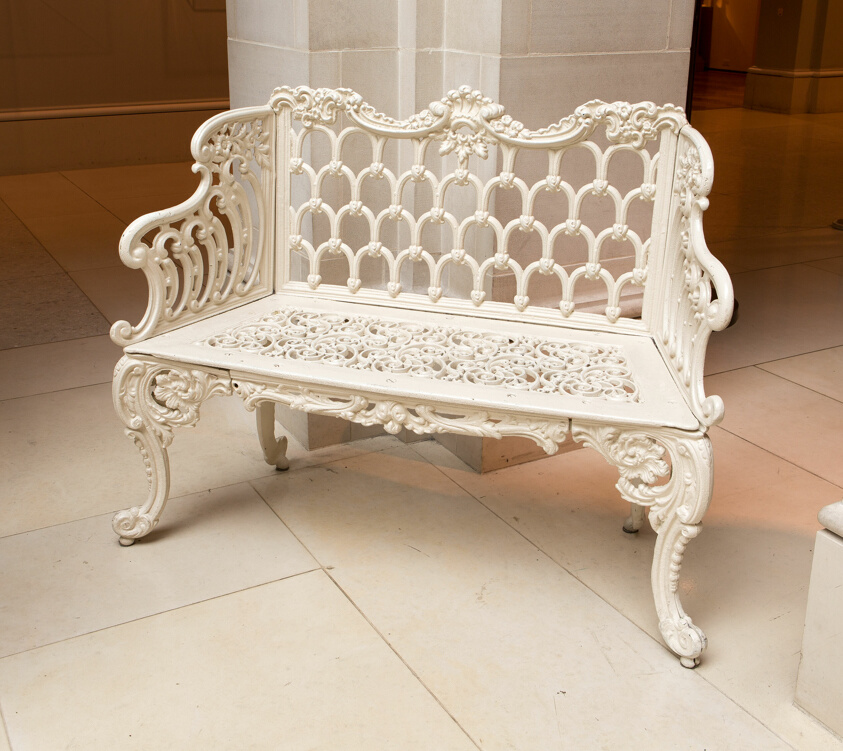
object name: Furniture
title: Settee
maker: Artist unknown (American, 19th century)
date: 1850–1900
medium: Painted cast iron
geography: United States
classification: seating; settee; furniture; american decorative arts; american arts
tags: furniture